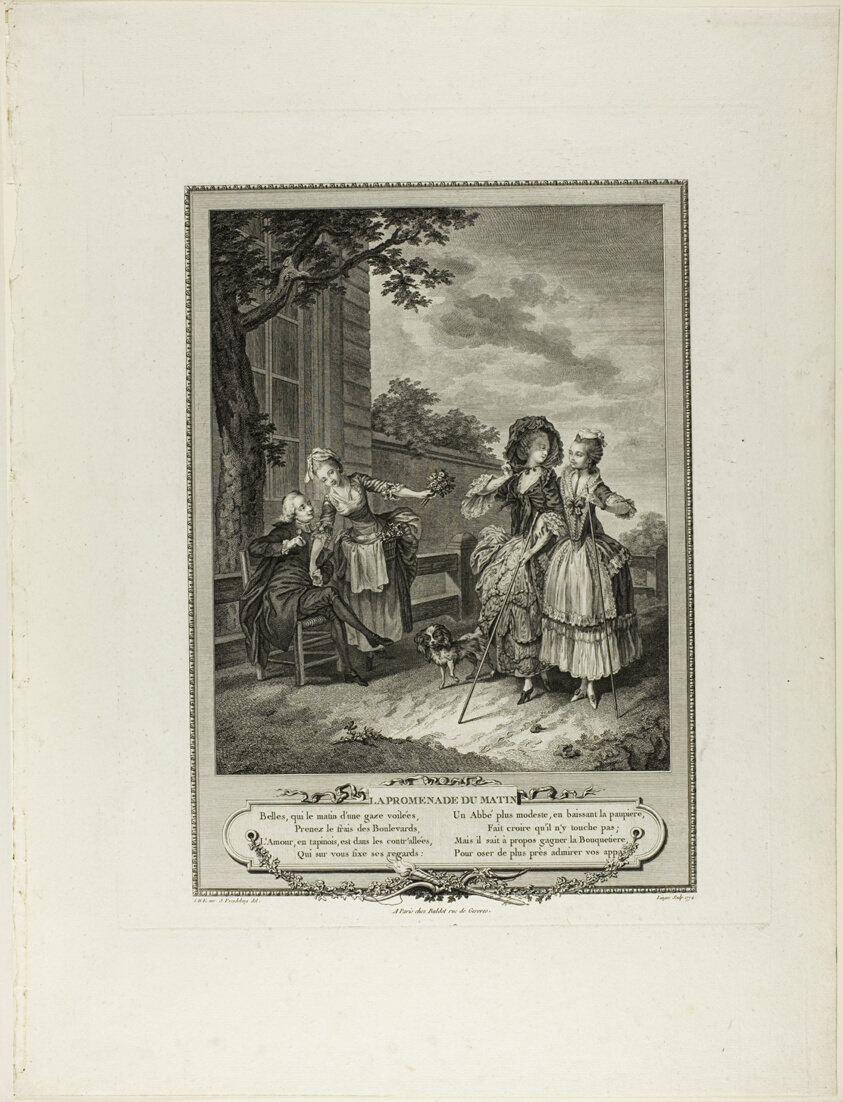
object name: Print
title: Morning Walk, from Monument du Costume Physique et Moral de la fin du Dix-huitième siècle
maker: Charles Louis Lingée (French, 1748-1819); after Sigmund Freudeberg (Swiss, 1745-1801) and Jean Henri Eberts (Swiss, 18th century); published by Laurent-François Prault (French 1712-1780)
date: 1774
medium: Engraving on paper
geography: France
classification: etching; print; prints and drawing